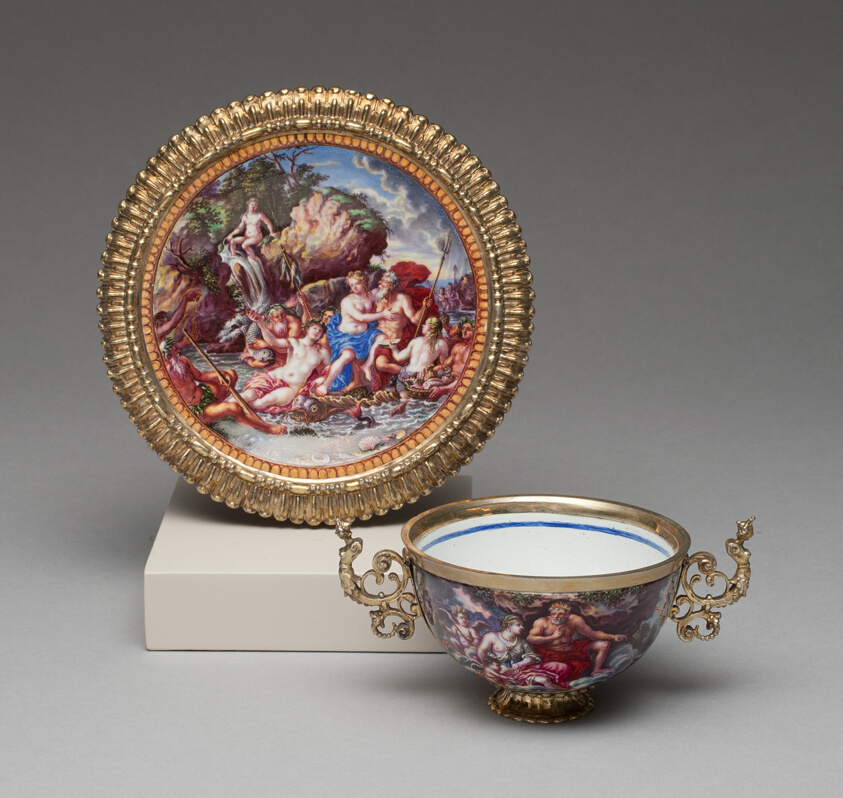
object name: Metalwork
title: Tea Bowl and Saucer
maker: Matthäus Baur II; German, active 1681–1728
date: c. 1700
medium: Silver-gilt, cast, embossed, and chased and enamels on copper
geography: Augsburg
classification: drinking vessel; silver; metalwork; european decorative arts